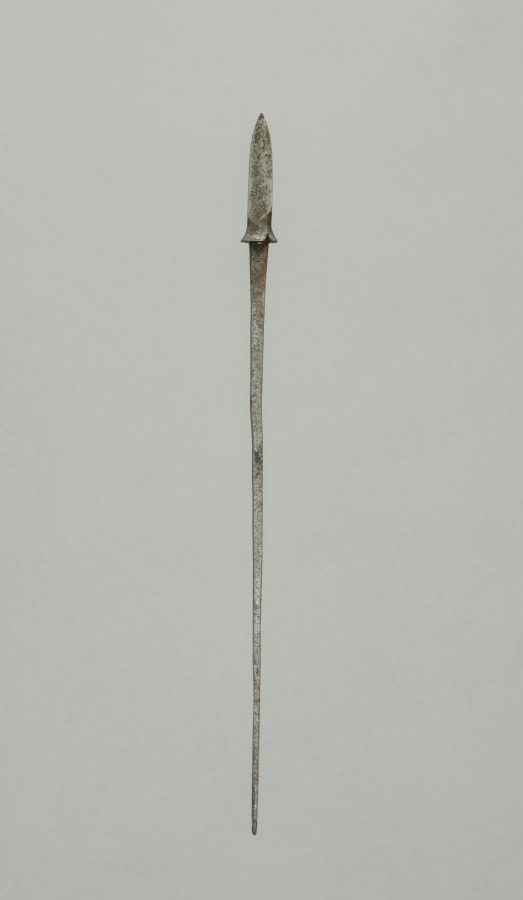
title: Arrow Point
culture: Japan, Edo period (1615–1868)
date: 1700s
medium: steel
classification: Arms and Armor